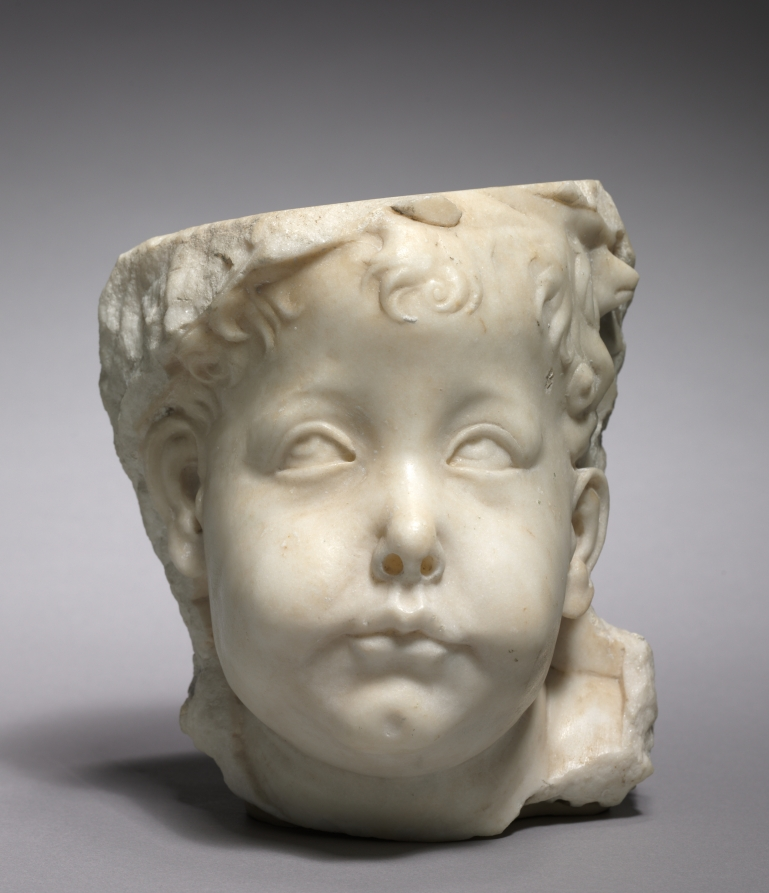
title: Head of a Putto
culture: Italy, Florence, 15th century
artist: follower of Desiderio da Settignano (Italian, 1429/32–1464)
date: 1450–1475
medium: marble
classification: Sculpture